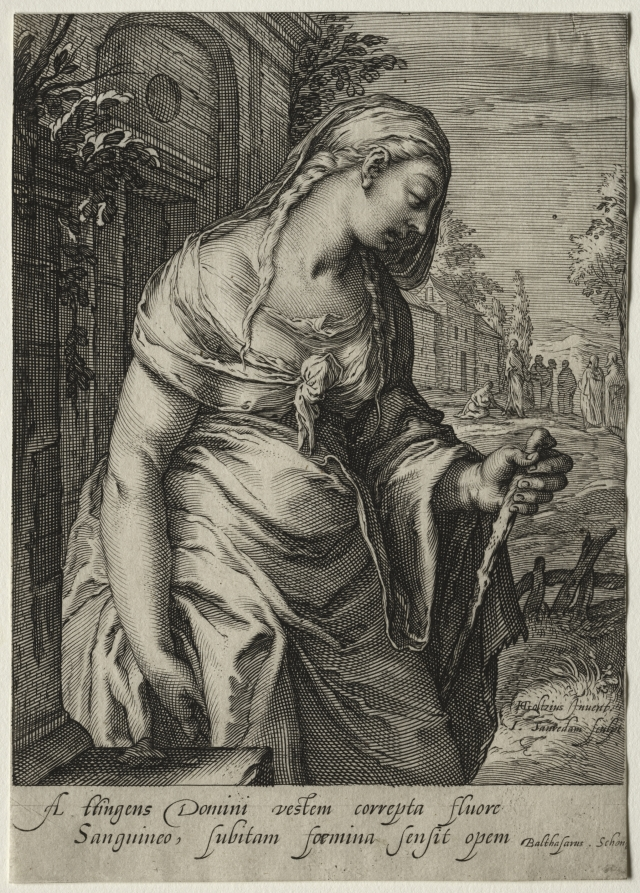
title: Heroines of the New Testament: The Woman with the Issue of Blood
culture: Netherlands, 16th century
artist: Jan Saenredam (Dutch, 1565–1607)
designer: after Hendrick Goltzius (Dutch, 1558–1617)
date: c. 1595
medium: engraving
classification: Print